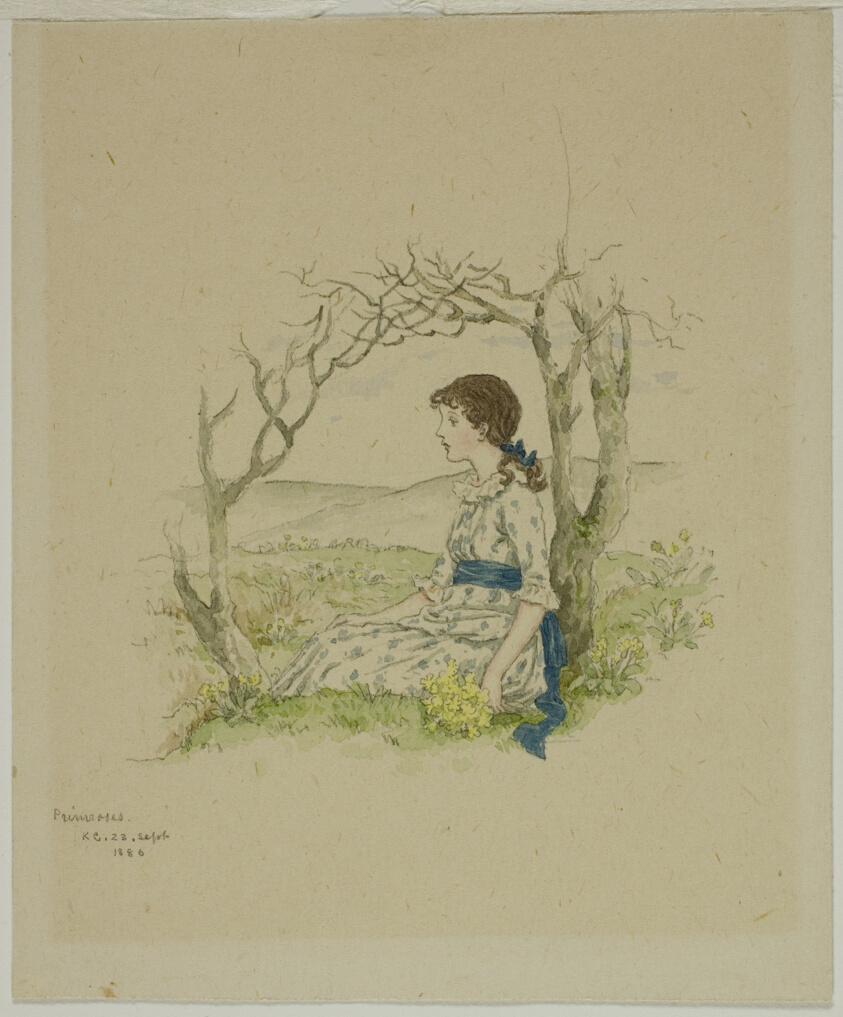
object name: Drawing and Watercolor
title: Seated Girl with Primroses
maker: Kate Greenaway (English, 1846-1901)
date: 1886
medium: Graphite and watercolor on cream wove paper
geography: England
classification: watercolor; drawings (visual works); prints and drawing